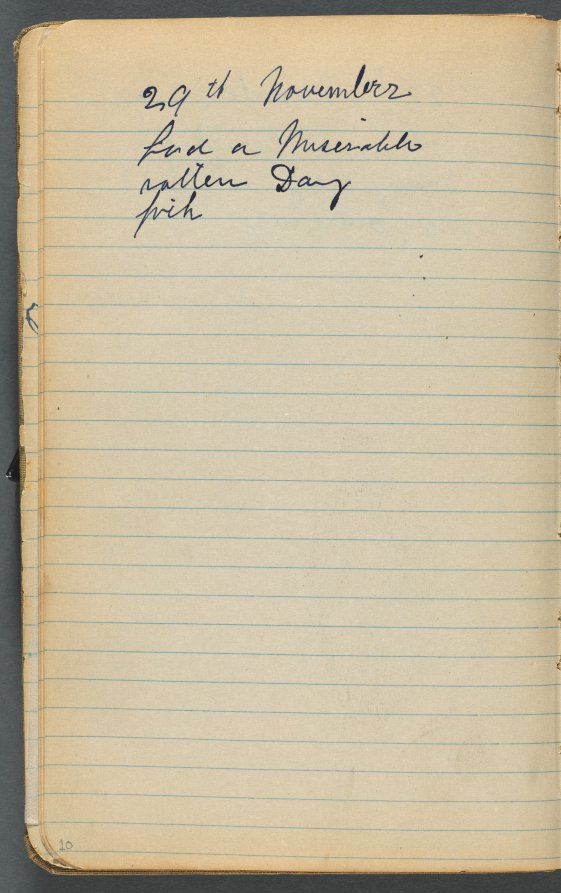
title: Sketchbook, page 010: Notes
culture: America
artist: Maurice Prendergast (American, born Newfoundland [now Canada], 1858–1924)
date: 1905–10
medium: graphite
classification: Bound Volume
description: This sketchbook contains 69 pages of drawings, a diary largely devoted to the state of the artist's health, and a three-page discourse on the nature of genius and ideas.